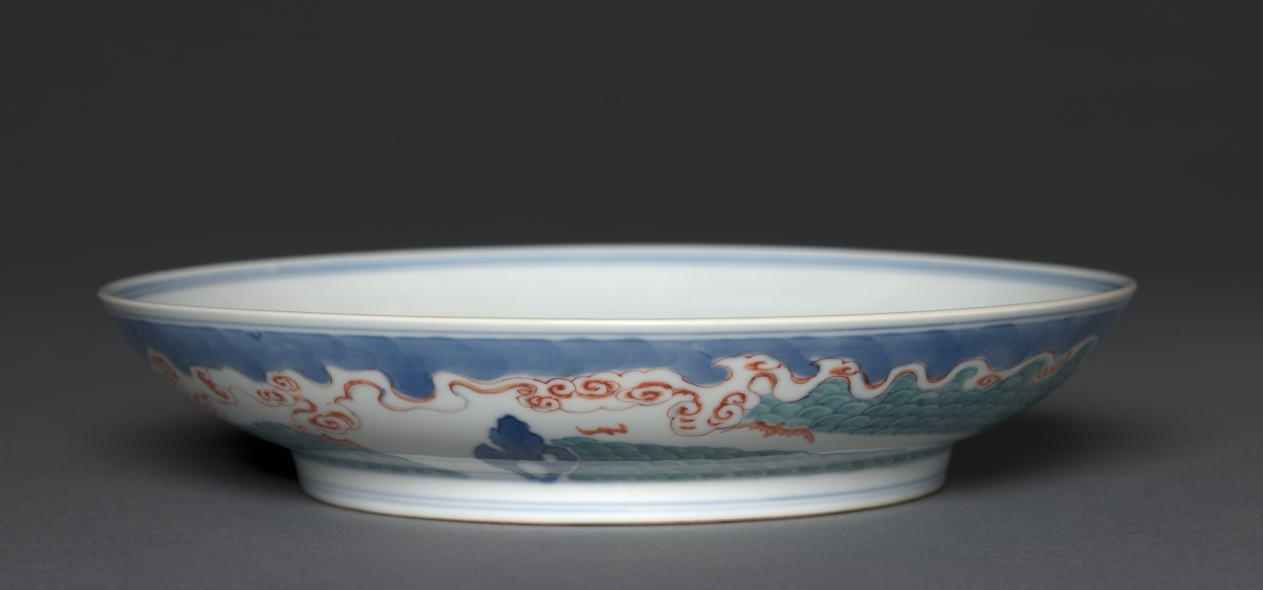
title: Plate with Isle of the Immortals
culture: China, Jiangxi province, Jingdezhen kilns, Qing dynasty (1644-1911), Yongzheng mark and reign (1723-35)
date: 1723–35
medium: porcelain decorated in underglaze cobalt blue and overglaze enamels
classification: Ceramic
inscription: 大清雍正年製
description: This multicolored dish is decorated with the sacred isle, also seen on the exterior of the blue-and-white dish nearby. A pavilion emerges amid rising and falling waves, a symbol of constant transformation and change. Above the waves are mysterious clouds, symbolizing the cosmic vital energy (qi) that animates all things and beings on earth in Daoism. The interior of the dish also shows cranes carrying sticks in their beaks, a motif that symbolizes longevity. Cranes carrying sticks above a pavilion in the sea express the wish “May you live to a ripe old age (haiwu tianchou; 海屋添籌).”